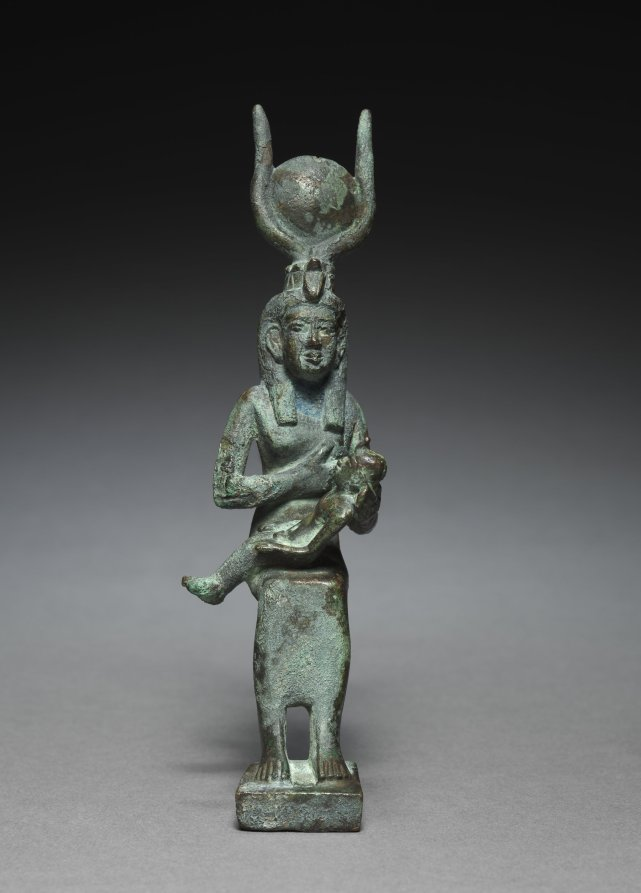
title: Statuette of Isis and Horus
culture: Egypt, Greco-Roman period (332 BCE–395 CE), Ptolemaic dynasty (305–30 BCE)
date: 305–30 BCE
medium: bronze, solid cast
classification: Sculpture